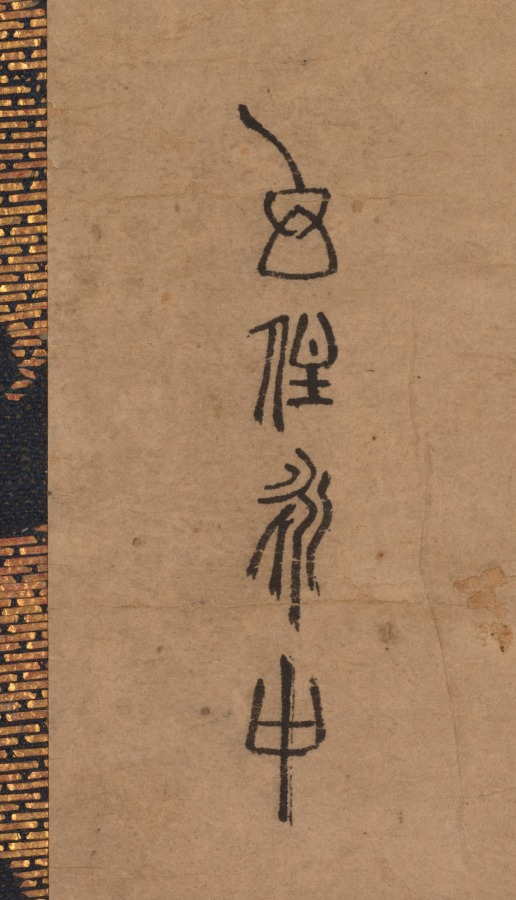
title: White-Robed Guanyin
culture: China, Yuan dynasty (1271-1368)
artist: Jueji Yongzhong (Chinese, active around 1300)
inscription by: Zhongfeng Mingben (Chinese, 1263–1323)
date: late 1200s–early 1300s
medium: hanging scroll; ink on paper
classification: Painting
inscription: Artist's signature: Huanzhu Yongzhong. Inscription by Zhongfeng Mingben: The right thinking [Samkalpa] is embodied within His deep meditation on the Buddha [naga-samadhi]. Retaining not even one single object of thought, A perfect harmony was wonderfully achieved. In the endless time and space, His all-embracing compassion prevails. [signed] Mingben of Huanzhu paying his respects.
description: Guanyin, the bodhisattva of infinite compassion (Avalokiteshvara, in Sanskrit), reveals himself in many forms. According to Buddhist belief, one such manifestation is the white-robed Guanyin sitting on a rock on the island of Putuo (Potalaka, in Sanskrit), located along the coast not far from Ningbo, in Zhejiang Province, China. Here, the figure was swiftly drawn in only a few ink lines. The inscription above is by Zhongfeng Mingben, perhaps the most widely respected and influential Chan (Zen in Japanese) master in the Yuan dynasty. The artist’s signature is a single line below on the left: Huanzhu Yongzhong.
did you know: The CMA collection includes a drawing by a Japanese priest, CMA 1978.47.2, inspired by this composition.